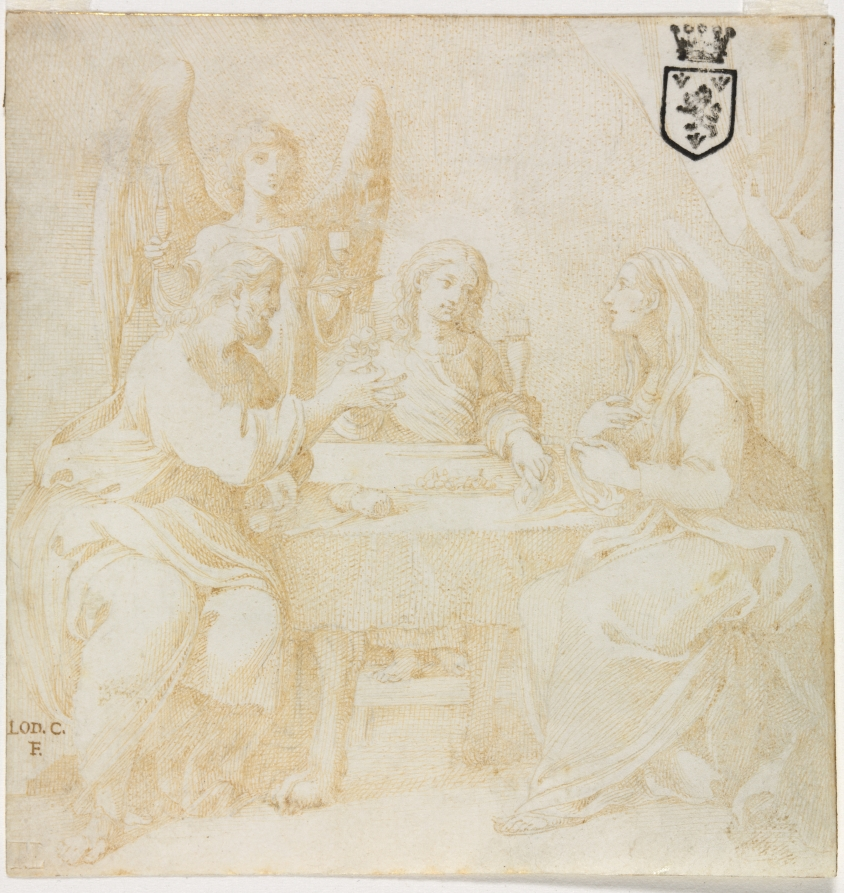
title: The Holy Family at Table Served by an Angel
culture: Italy, 17th century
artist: Ludovico Carracci (Italian, 1555–1619)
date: c. 1608–10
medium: pen and gold ink over traces of black chalk(?); framing lines in gold ink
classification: Drawing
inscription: signed, lower left, in gold ink: LOD.C. / F. ; RECTO OF OLD MOUNT (now removed), lower left, in graphite: 39 ; VERSO OF OLD MOUNT (now removed), center, in blue pencil: 30. Lodovico Carracci / Christ with Virgin attended / by an Angel.